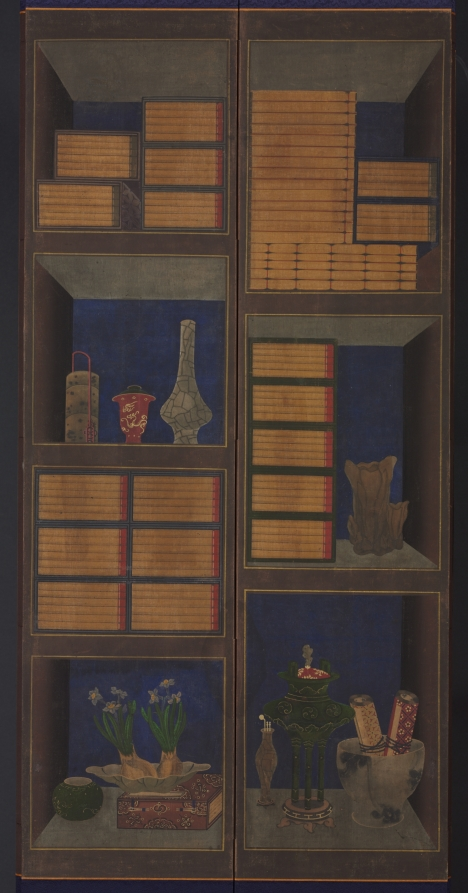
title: Books and Scholars’ Accoutrements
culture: Korea, Joseon dynasty (1392–1910)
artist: Yi Taek-gyun (Korean, 1808–after 1883)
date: late 1800s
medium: ten-panel folding screen; ink and color on silk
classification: Painting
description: First produced around the second half of the eighteenth century, chaekgado (literally, “pictures of bookshelves”) flourished throughout the 1800s as a royal emblem. And soon this pictorial genre became a popular furnishing item for aristocrats' elegant studies. The third panel from the right bears a hidden seal that reveals the artist: Yi Taek-gyun, a prominent court artist active in the late 1800s.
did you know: A convincing hypothesis that connects the Korean chaekgado tradition with the Renaissance tradition of illusionistic studiolo through the technique of trompe-l'œil and Chinese Qing period treasured cabinet paintings was first made in Park Shim-eun's thesis (2002).